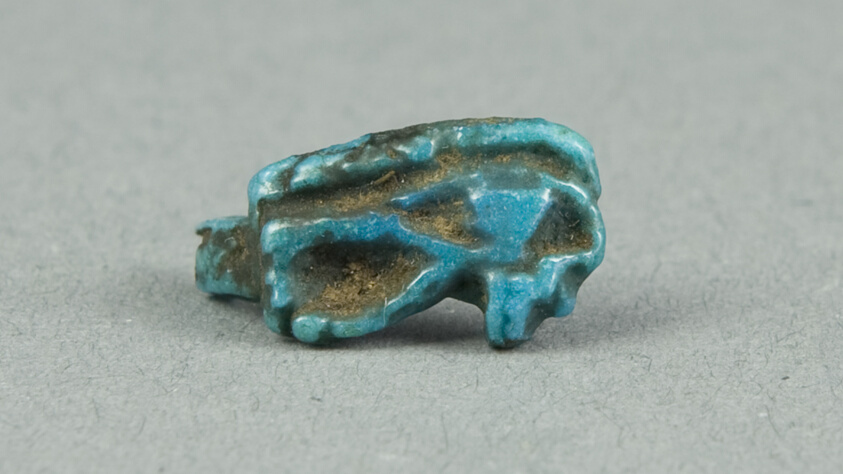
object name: Costume and Accessories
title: Eye of Horus (Wedjat) Finger Ring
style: new kingdom, egyptian, ancient, eighteenth dynasty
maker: Egyptian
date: New Kingdom, Dynasty 18 (about 1350 BCE)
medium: Faience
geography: Egypt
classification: ring (jewelry); ceramics; jewelry; ancient art; costume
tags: eye of Horus